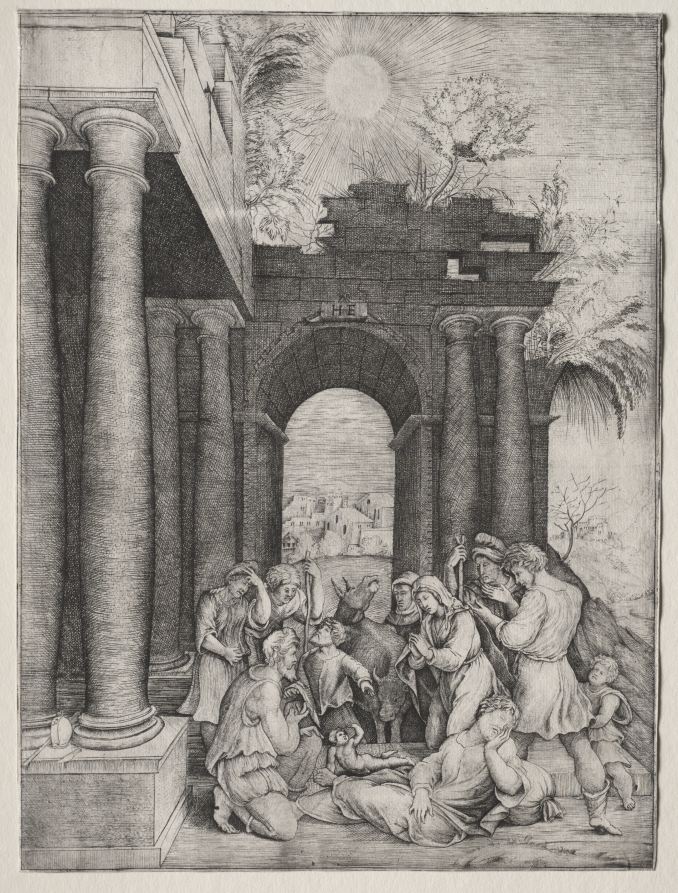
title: The Adoration of the Shepherds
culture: Italy, 16th century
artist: Master H. E. (Italian)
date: c. 1500s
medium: engraving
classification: Print